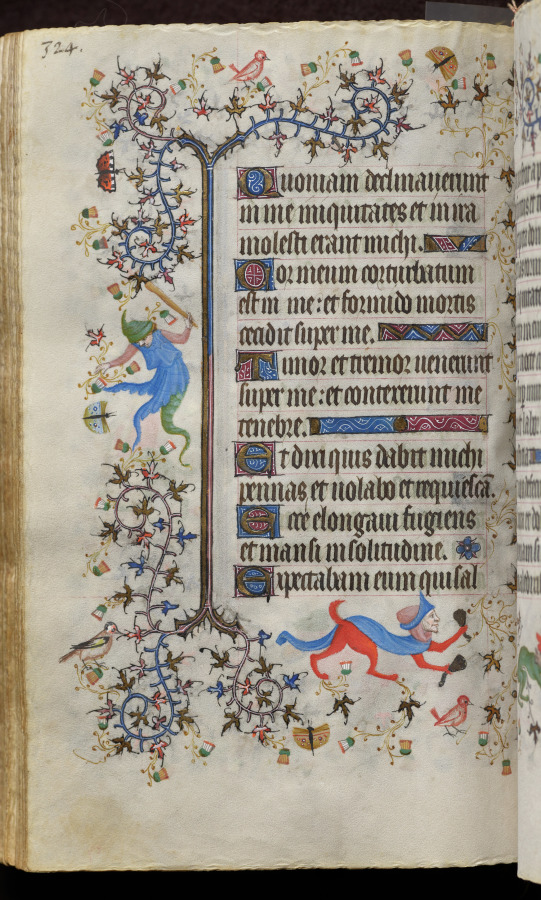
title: Hours of Charles the Noble, King of Navarre (1361-1425): fol. 162v, Text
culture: France, Paris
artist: Master of the Brussels Initials and Associates (French)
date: c. 1405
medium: ink, tempera, and gold on vellum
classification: Bound Volume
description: This precious volume was obviously highly prized by its owner, the French-born King of Navarre, who had his coat of arms painted on no less than twenty folios. Rather than directly commissioning this manuscript from a specific workshop, it seems that Charles the Noble acquired his book of hours -- perhaps ready-made for the luxury market -- while on a trip to Paris in 1404-05. A collaborative effort, six painting styles are evidenced within the pages of this codex, those of two Italians, two Frenchmen, and two Netherlanders. The painter who was responsible for the planning and decoration of the book, and who produced seventeen of the large miniatures, was a Bolognese artist known as the Master of the Brussels Initials. His principal assistant, responsible for most of the borders, was a Florentine who signed his name "Zecho" da Firenze on folio 208 verso.